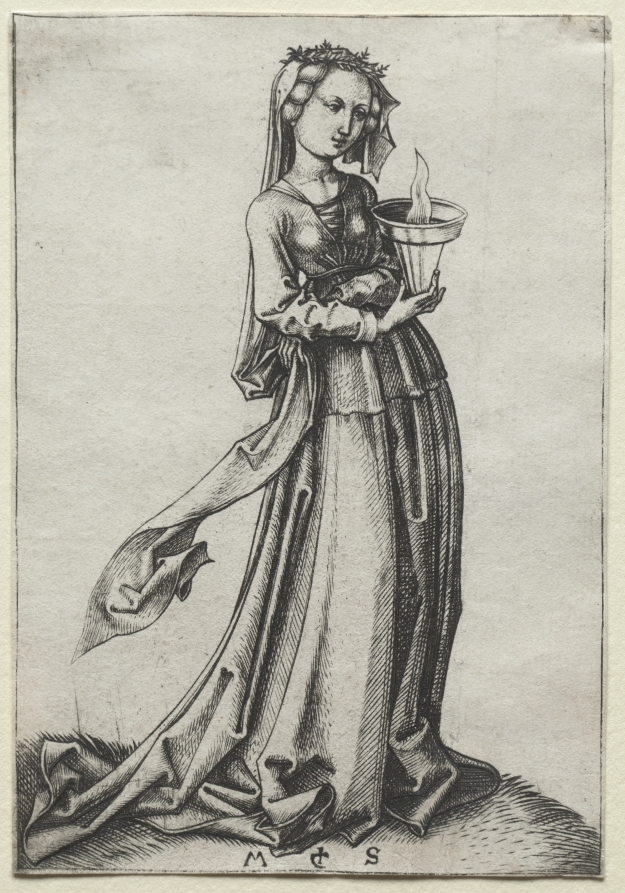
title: The Fourth Wise Virgin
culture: Germany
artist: Martin Schongauer (German, c. 1450–1491)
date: 1469–79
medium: engraving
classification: Print